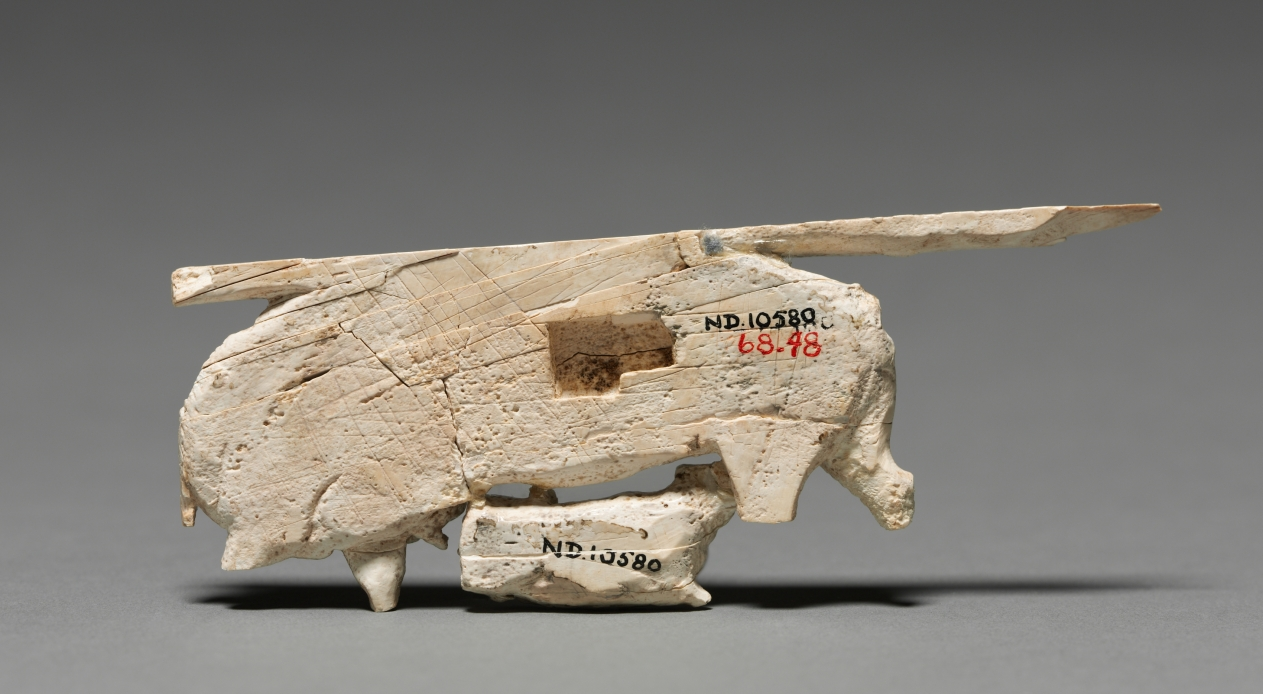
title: Decorative Plaque: Cow Nursing Its Calf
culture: Phoenicia, Iraq, Nimrud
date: 900–800 BCE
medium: ivory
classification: Ivory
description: This small plaque was executed in the Phoenician style with symmetrical compositions, elongated figural proportions, and Egyptian subjects and motifs. Examples have been found throughout the Middle East, but thousands come from Nimrud where most were excavated in the storerooms of a military arsenal built by King Shalmaneser II (858-824 bc). When the Nimrud palace was sacked in the 7th century bc, these ivories were thrown into a well, where Sir Max Mallowan (the husband of Agatha Christie) discovered them in 1951. The monumental wall relief (1943.246) was found at the same Assyrian palace at Nimrud.